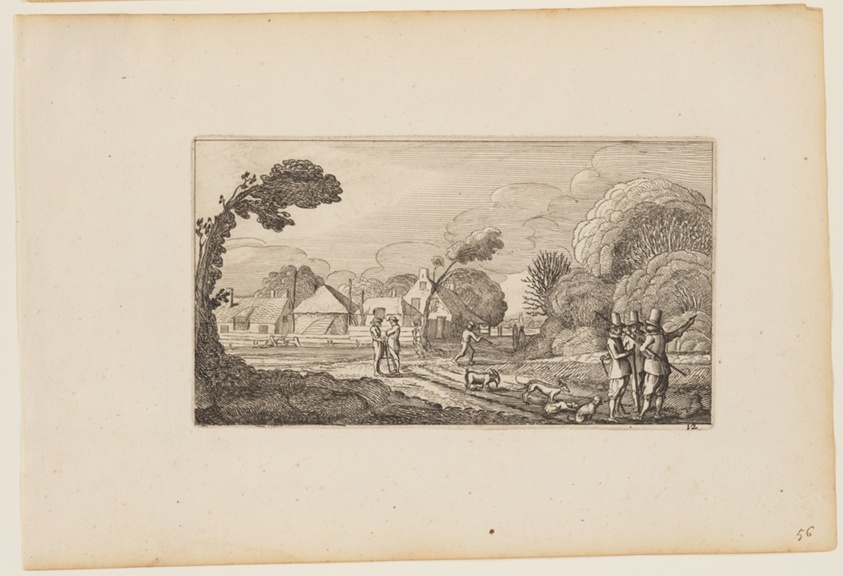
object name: Print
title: Several Men on Path Before a Farm, from Twelve landscapes with Figures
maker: After Gillis van Scheyndel; Dutch, 1595–1660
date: 1624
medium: Etching on ivory laid paper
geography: Netherlands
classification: etching; paper; print; prints and drawing